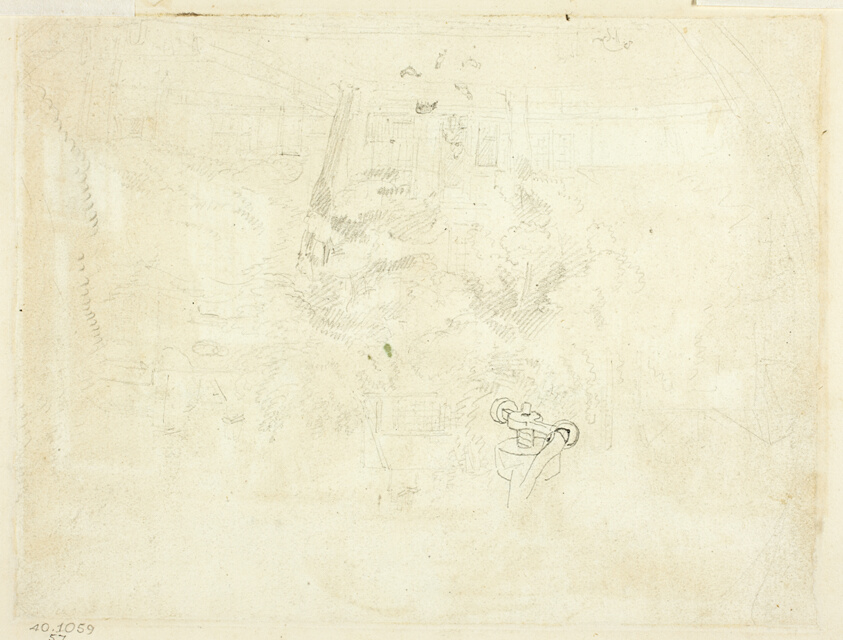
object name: Drawing and Watercolor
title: Study for The Mint, from Microcosm of London (recto); Sketch of Courtyard (verso)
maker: Augustus Charles Pugin (English, born France, 1762-1832); Thomas Rowlandson (English, 1756-1827)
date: c. 1809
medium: Graphite (recto and verso) on ivory wove paper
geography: England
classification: graphite; drawings (visual works); prints and drawing